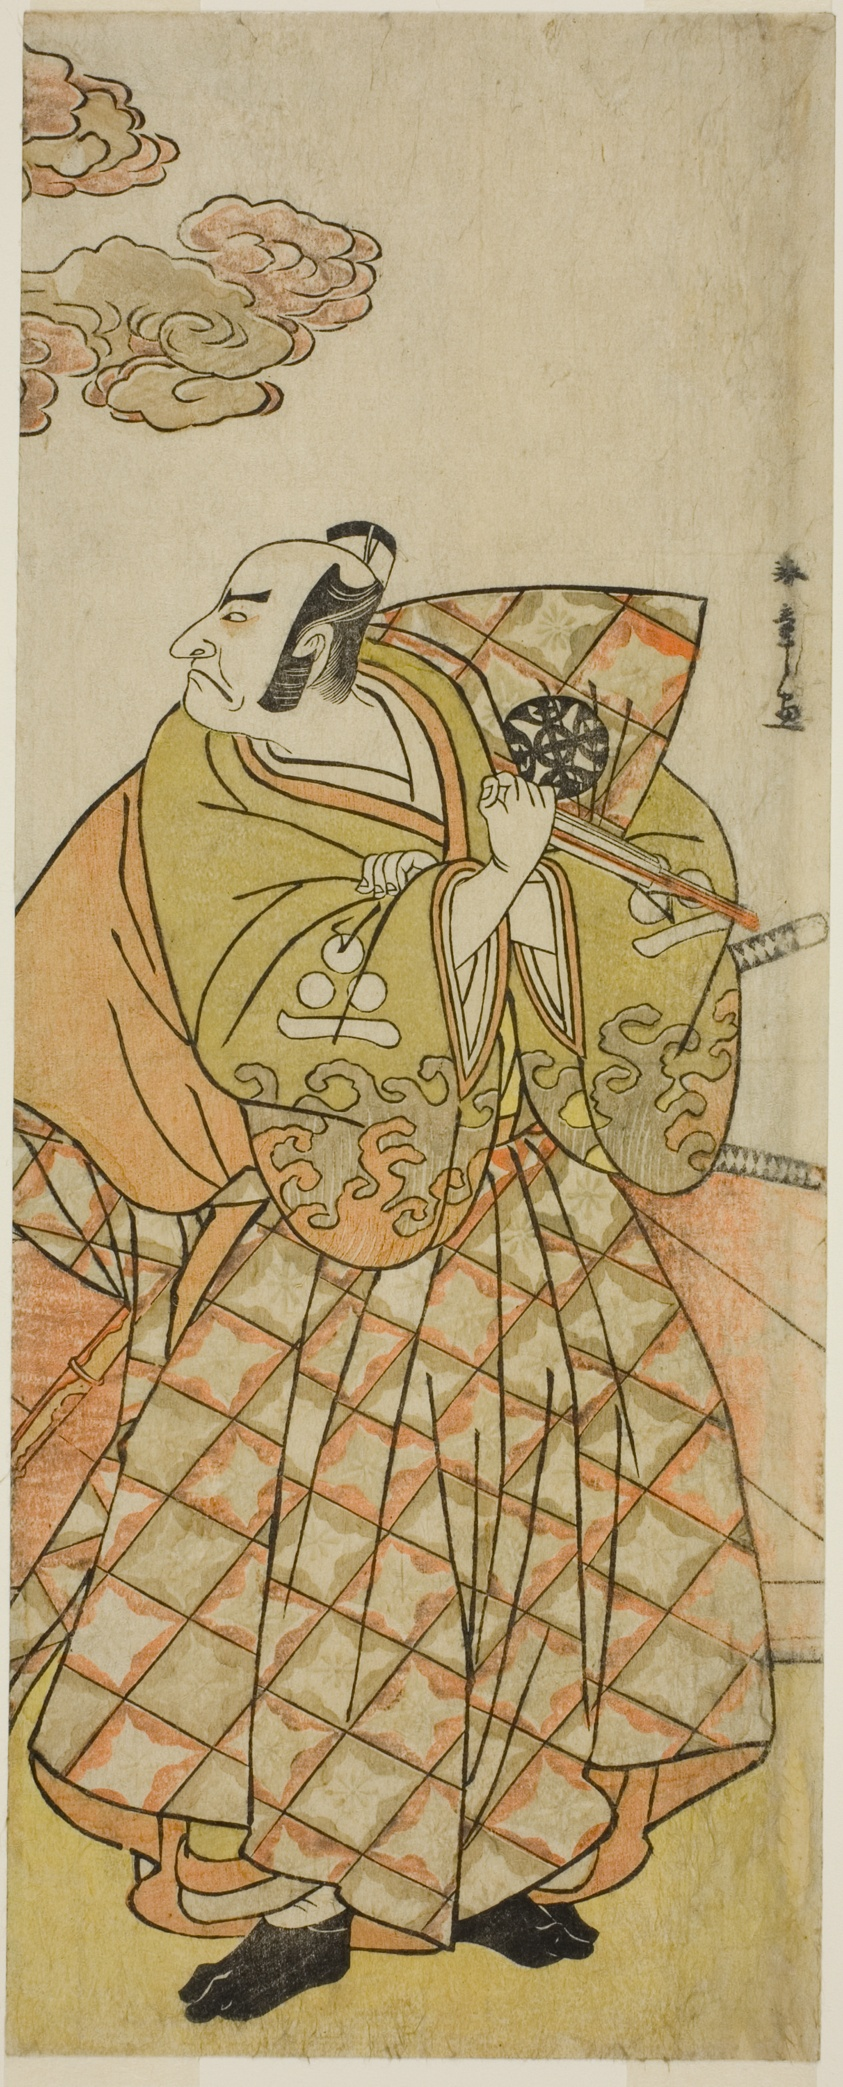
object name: Print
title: The Actor Nakamura Nakazo I as Watanabe no Tsuna in the Play Shitenno Tonoi no Kisewata, Performed at the Nakamura Theater in the Eleventh Month, 1781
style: Japanese (culture or style)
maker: Katsukawa Shunsho 勝川 春章; Japanese, 1726-1792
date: c. 1781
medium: Color woodblock print; hosoban; right sheet of diptych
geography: Japan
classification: woodblock print; print; asian art